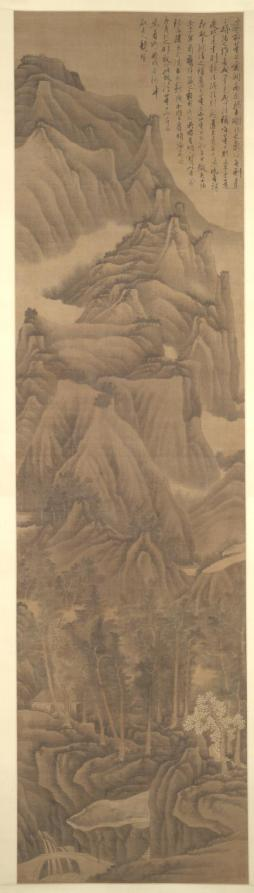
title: Landscape in the Style of Dong Yuan and Juran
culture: China, Qing dynasty (1644-1911)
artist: Gong Xian (Chinese, 1599–1689)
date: c. 1650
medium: hanging scroll, ink with white pigment on silk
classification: Painting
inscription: 畫家董巨，實開南宗。既無剛根之氣，復無刻畫之跡。後之作者或以才見，或以法稱。唯董巨則幾乎道矣。然逞才則離法，泥法則叛道。至道無可道。說者謂即歛才就法之謂道。問之董巨，而董巨不知，忽乎微矣。此幅余二十年前舊作。藏之新安吳氏。吳君晉明寶之若家珍。後携之金陵。命余題識。余因與晉明論畫及此，并紀之。非敢曰此效法董巨而有得焉者也。 庚戌冬杪半畝居人龔賢。 [印]龔半千; 野遺賢; [左下]龔賢; [上]可能另有龔賢一印。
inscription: 2 additional seals of Cheng Qi 程琦 (1911–1988)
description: Towering peaks and unfolding ranges are piled up and overlaid with layer after layer of brushwork to give an overall dense, dark, and even melancholic effect. Gong Xian created a personal style of landscape, which departed greatly from his models Dong Yuan and Juran. The tension between tradition and individuality had been a topic of interest for the Chinese artist. As Gong Xian writes in his inscription: "Painters of later periods may be known for their natural talents or praised for their observance of established traditions. . . . However, those who indulge in showing off their talent will deviate from the tradition, while those who adhere to tradition will alienate themselves from the Dao. The supreme Dao is inexplicable in words. . . ."